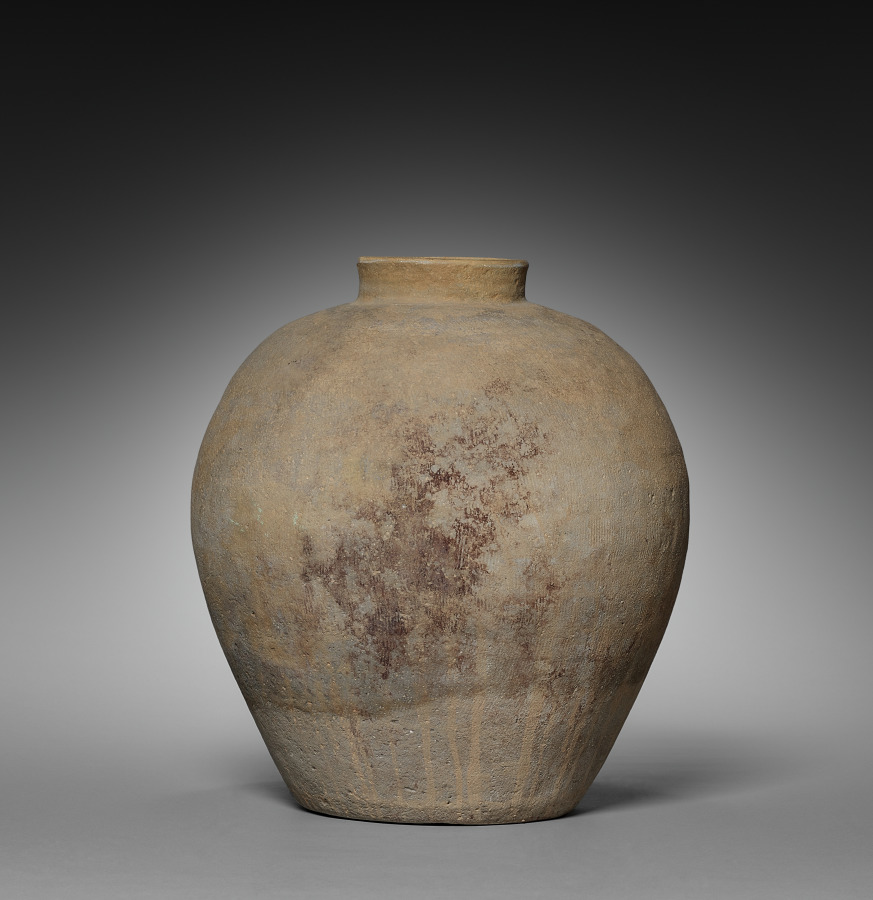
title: Burial Urn with Cover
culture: Korea, Three Kingdoms period (57 BCE–668 CE)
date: 300s–500s CE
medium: earthenware with impressed design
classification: Ceramic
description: Produced in closed kilns built on hillsides during the Three Kingdoms period, this lidded jar once contained the cremated remains of the dead. This type of burial jar became widespread after the introduction of Buddhism, as cremation became a common practice in Korea.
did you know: Closed kilns built on hillsides became widely used for producing this type of pottery vessel in Korea during the Three Kingdoms period.